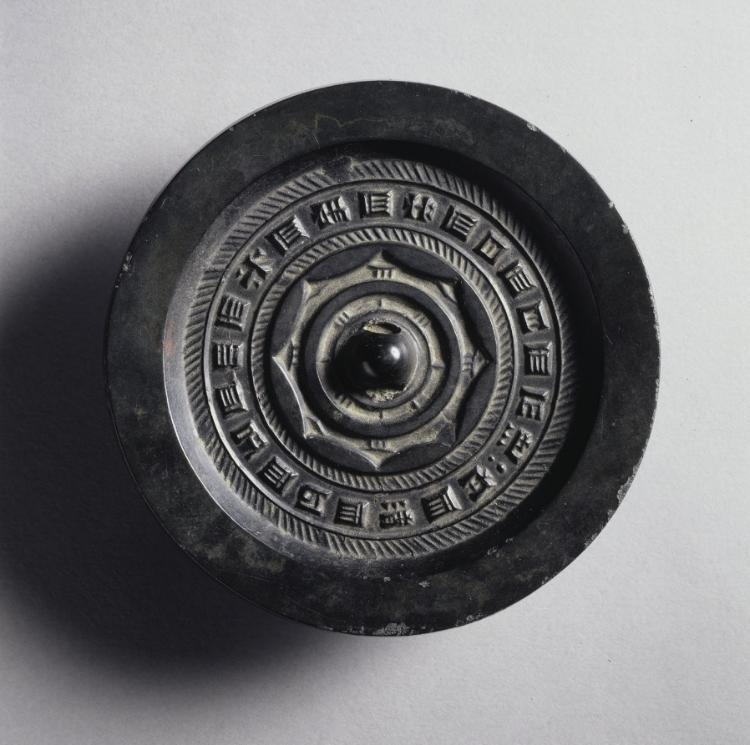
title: Mirror with Concentric Circles and Linked Arcs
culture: China, Western Han dynasty (206 BCE–8 CE)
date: late 300s BCE–50 CE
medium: bronze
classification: Metalwork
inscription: 內清以昭明，光象夫日月，【心忽楊而愿忠，然雍塞而】不泄。